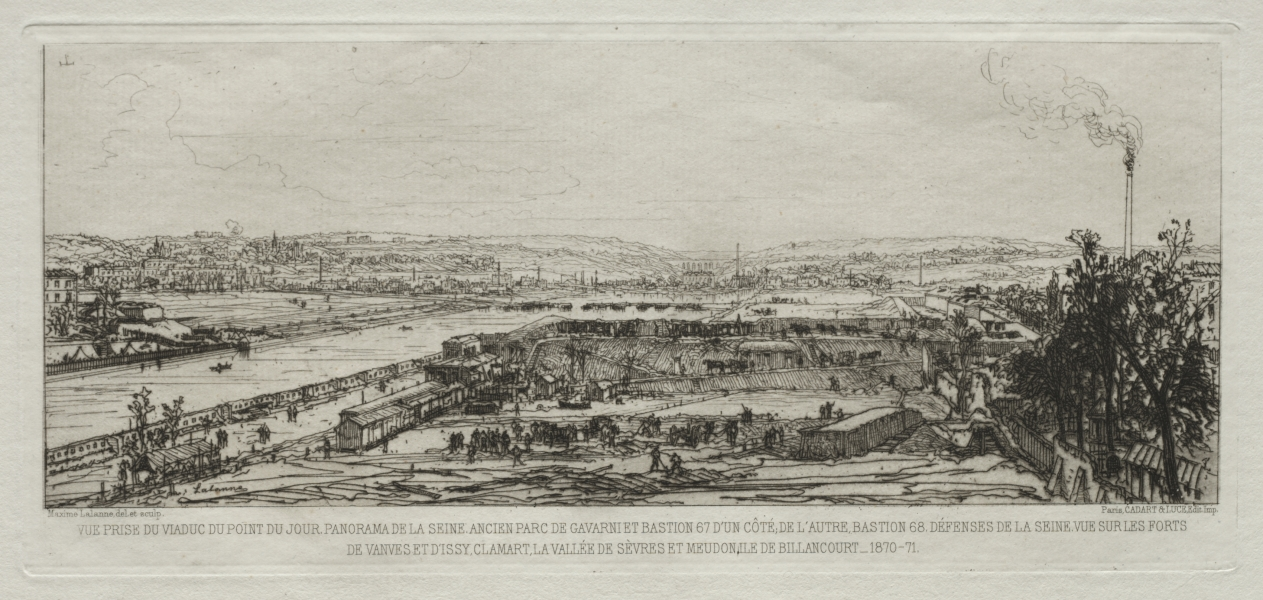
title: View from the Viaduct at the Pont-du-Jour, Panorama de la Seine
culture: France, 19th century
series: Souvenir artistiques du Siège de Paris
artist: Maxime Lalanne (French, 1827–1886)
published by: Cadart et Luce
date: 1870–71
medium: etching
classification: Print